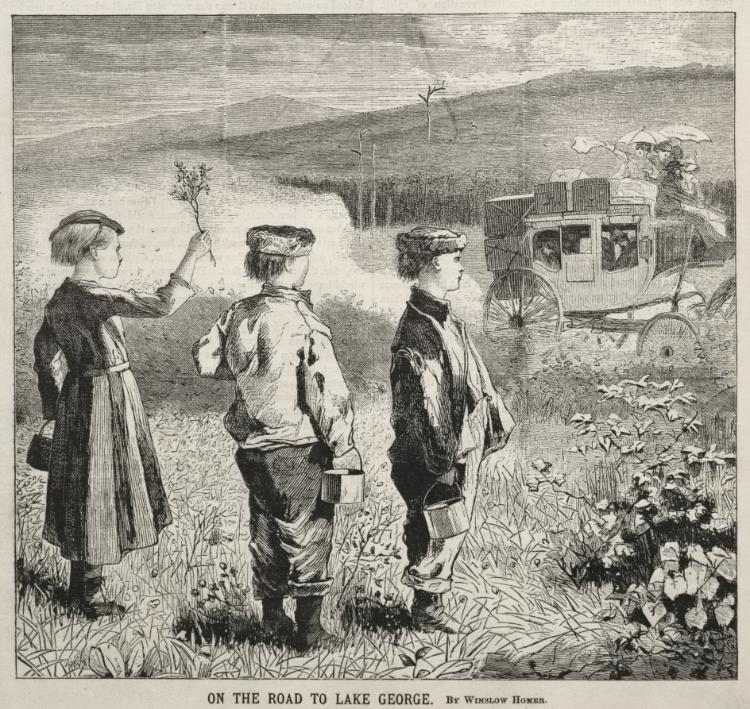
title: On the Road to Lake George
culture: America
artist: Winslow Homer (American, 1836–1910)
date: 1869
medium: wood engraving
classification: Print